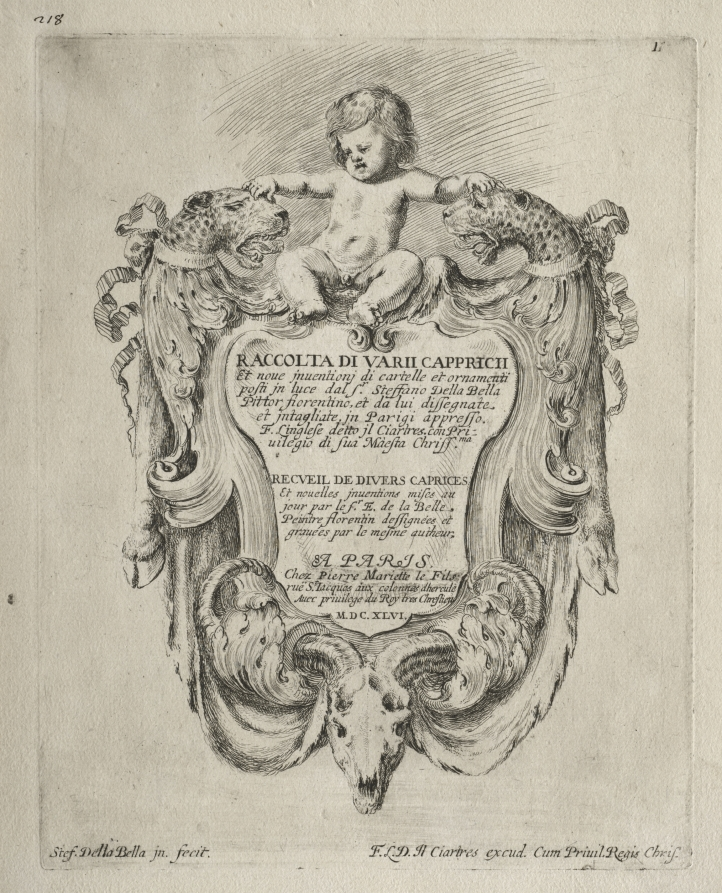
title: Collection of Various Caprices and New Designs of Cartouches and Ornaments: No 1, Title Page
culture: Italy, 17th century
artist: Stefano Della Bella (Italian, 1610–1664)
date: 1646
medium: etching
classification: Print